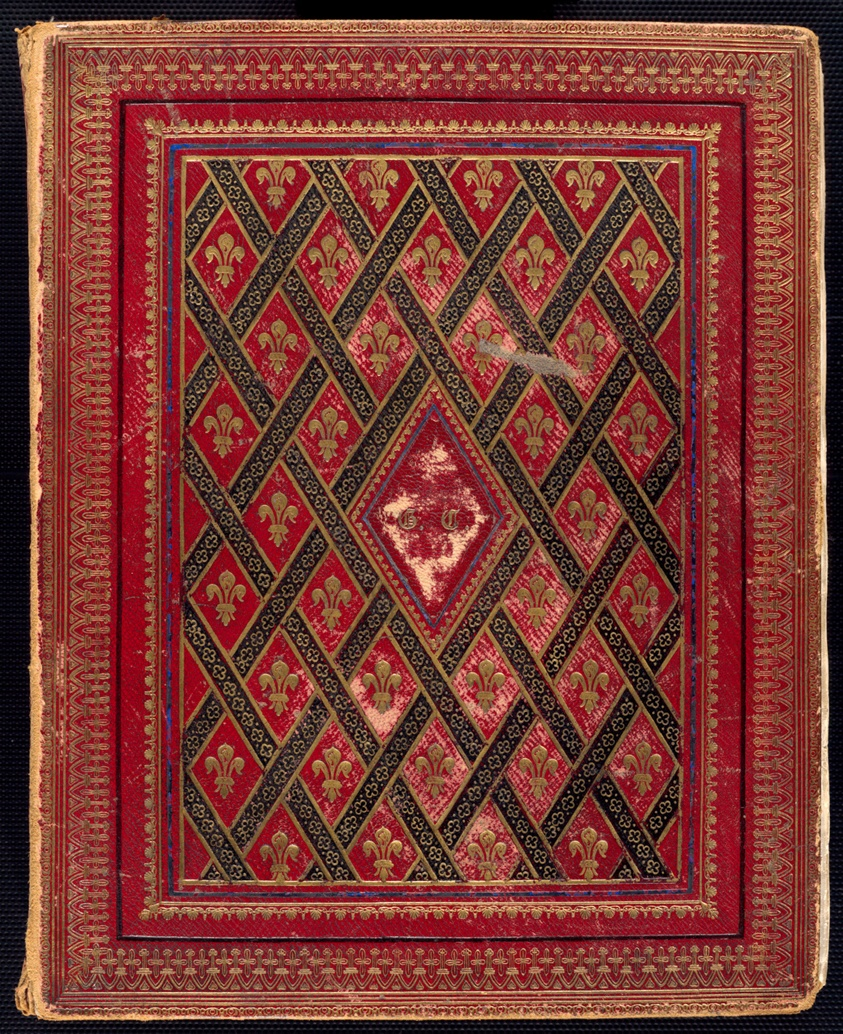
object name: Book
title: The George Cowper Album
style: 19th century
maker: Artist unknown; English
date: 1849/60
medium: Victorian album of albumen silver prints from wet-collodion glass negatives in red leather cover with fleur de lys and embossed initials "G.C.". (122)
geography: England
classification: albumen silver print; photographic process; photography; book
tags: Collected by Hugh Edwards